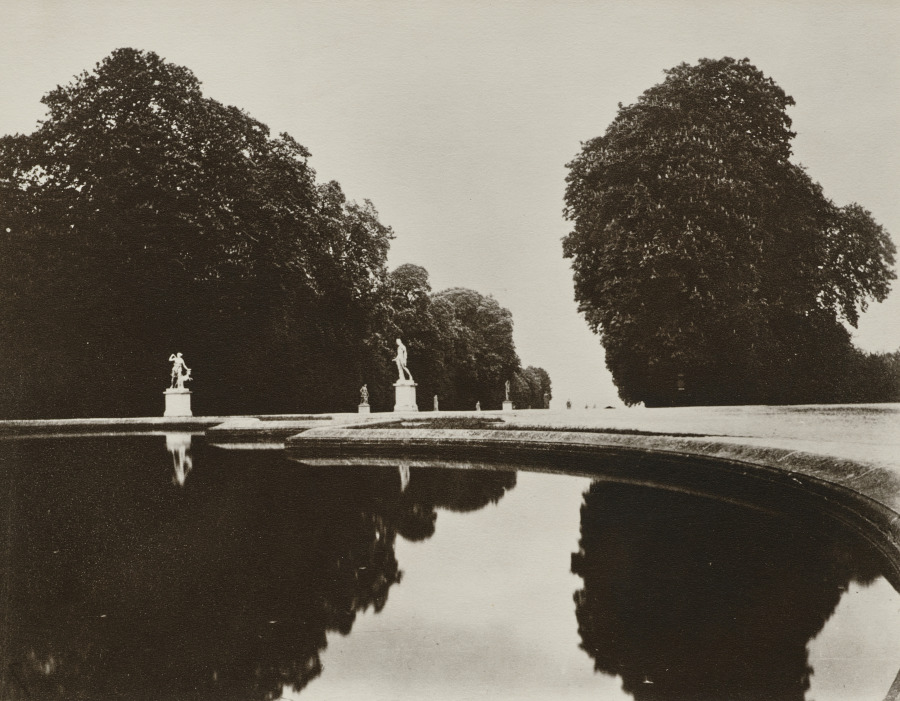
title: St. Cloud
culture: France, 20th century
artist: Eugène Atget (French, 1857–1927)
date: 1915–19, printed 1931-late 1950s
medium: gelatin silver print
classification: Photograph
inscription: Written in pencil on verso: "Eugene Atget"